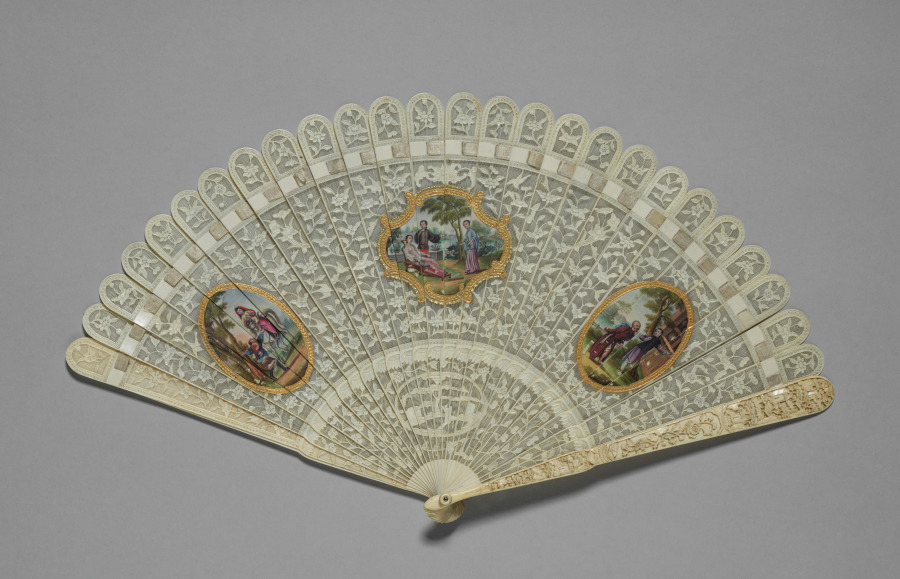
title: Brisé Fan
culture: China, 19th century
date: 1800s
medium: carved and pierced ivory sticks with three painted medallions in European style, held together by a white silk ribbon and an iron pin at the pivot point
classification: Ivory